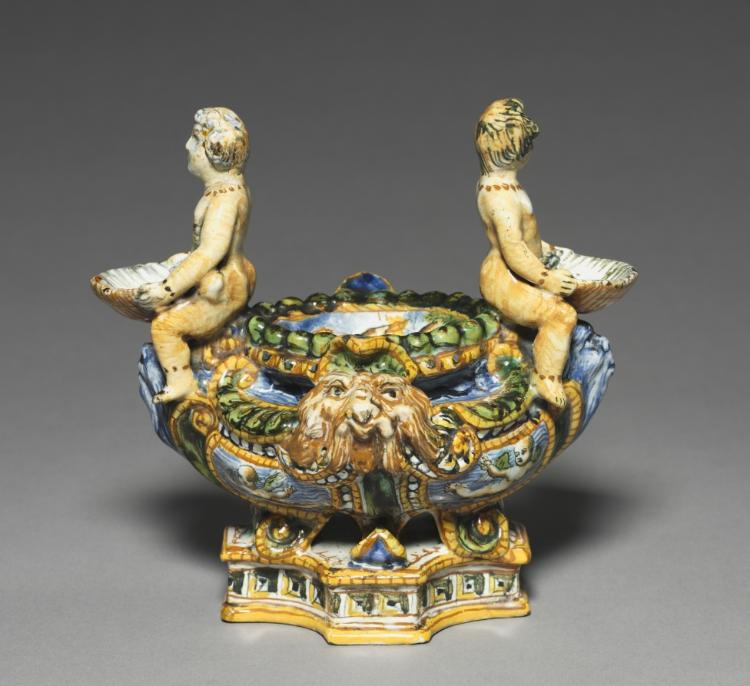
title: Saltcellar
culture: Italy, Urbino, 16th century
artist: circle of the Patanazzi Family (Italian)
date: c. 1570–90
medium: tin-glazed earthenware (maiolica)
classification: Ceramic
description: During the Italian Renaissance of the 1400s and 1500s, nobles and merchants eager to express their wealth and sophistication ordered ceramics for dining, display, and storage. Known as maiolica, because it resembled the brightly colored ceramics from the Mediterranean island of Majorca, these ceramic vessels were covered with a tin glaze that provided an opaque white surface on which colorful decoration could be painted.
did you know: During the Renaissance, salt was an expensive commodity and was used to both season and preserve food.